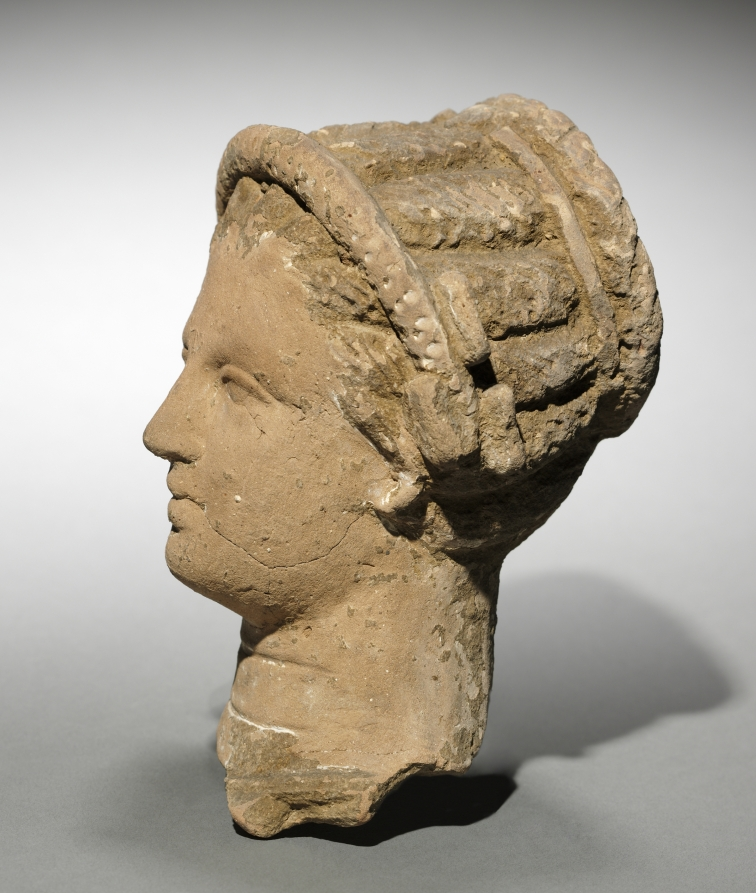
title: Head of a Woman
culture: Greece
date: 400s BCE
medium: terracotta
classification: Sculpture